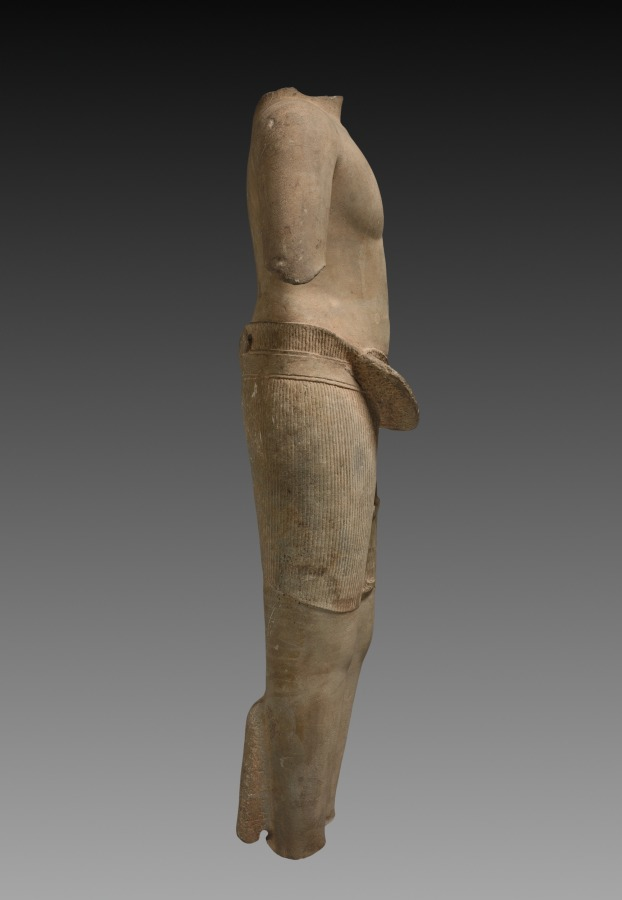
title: Male Deity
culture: Cambodia, Koh Ker-Khleong style, 10th century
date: 925–50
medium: sandstone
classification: Sculpture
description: The distinctive swath of pleated cloth and the anchor-shaped ends of the lower garment suggest that this sculpture was made when this method of wrapping the sampot was fashionable. During that time, Cambodian temples were dedicated to Hindu deities, whose images were dramatically installed alone on a pedestal in a temple's sanctum. When consecrated, gold tokens were installed under the pedestal; many sculptures were broken when people toppled them to get the gold.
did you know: This male deity seems to be striding with his left leg advanced subtly forward.